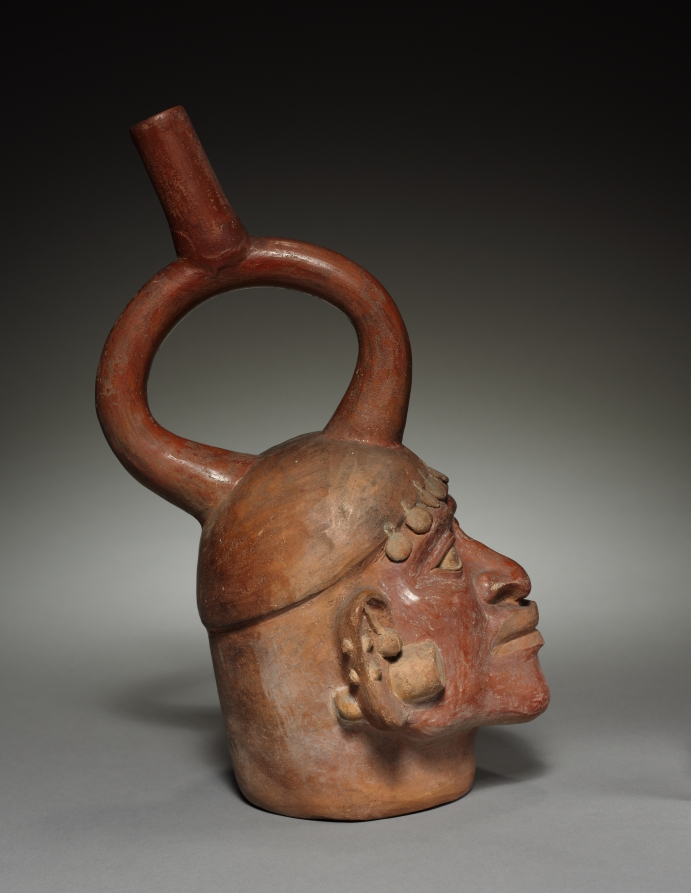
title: Bottle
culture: Peru, Mochica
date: before 1930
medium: pottery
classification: Ceramic